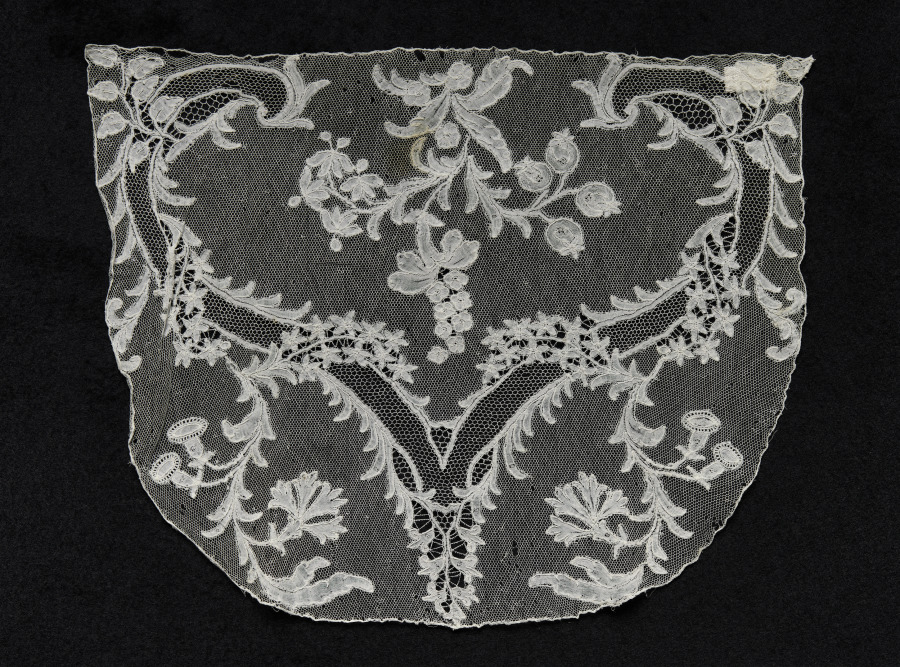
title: Lace Cap Crown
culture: Flanders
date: 1700s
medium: Linen: bobbin lace (Point d'Angleterre)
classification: Lace